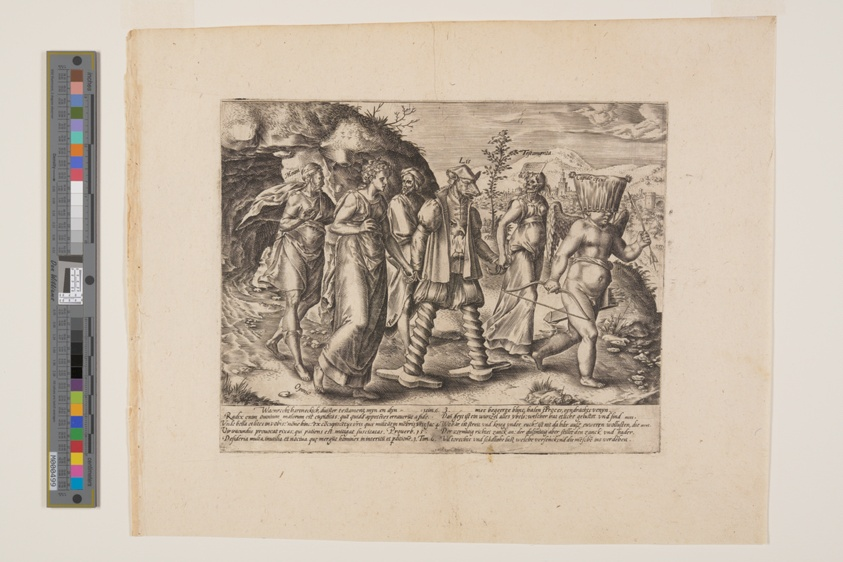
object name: Print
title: Avarice is the Root of all Evil, from Litis Abusus (The Abuses of the Law)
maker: Hendrick Goltzius (Dutch, 1558–1617)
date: c. 1576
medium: Engraving on ivory laid paper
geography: Netherlands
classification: print; paper; prints and drawing; engraving